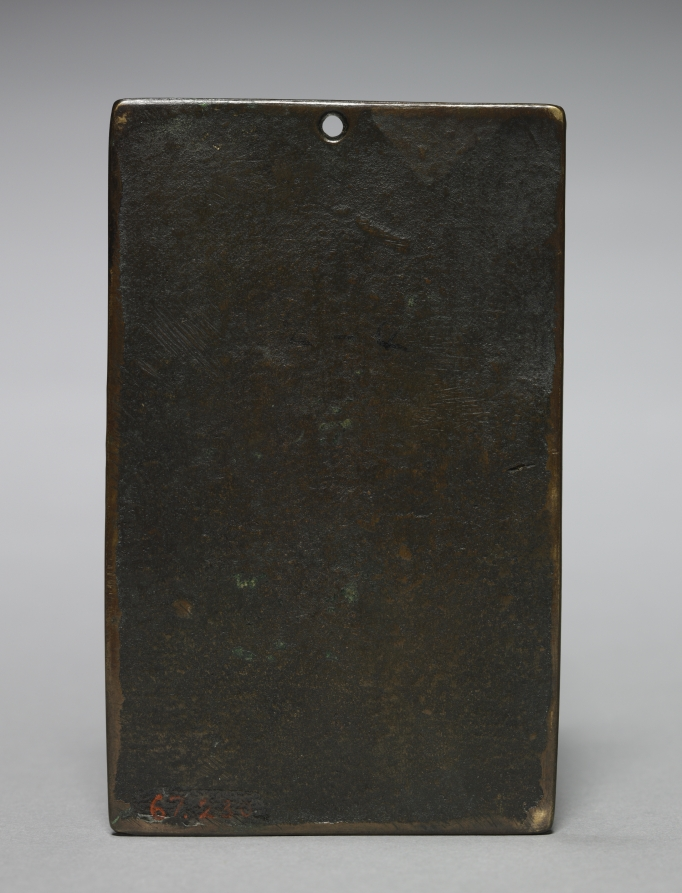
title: Allegory of Music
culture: Northern Italy, 16th century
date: c. 1500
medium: bronze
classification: Sculpture